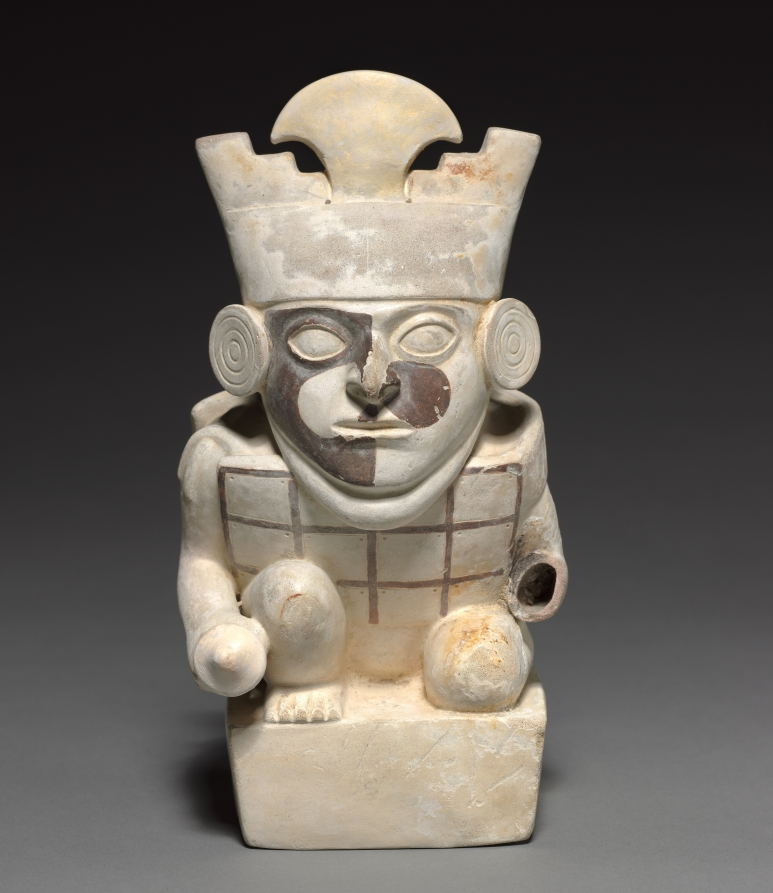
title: Warrior Vessel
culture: Peru, North Coast, Moche, Moche style (50-800)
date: c. 50–200 CE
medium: earthenware with colored slips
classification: Ceramic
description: This vessel's exquisite, crisp detail rewards careful viewing. The modeling of the feline pelt on the back is especially delicate and sharp, and each of the squares on the tunic carries a tiny dot in the upper corners, as though the squares represent plates of metal or shell attached to fabric. The face is decorated with paint or tattooing, and the headdress supports a curved, blade-shaped form.